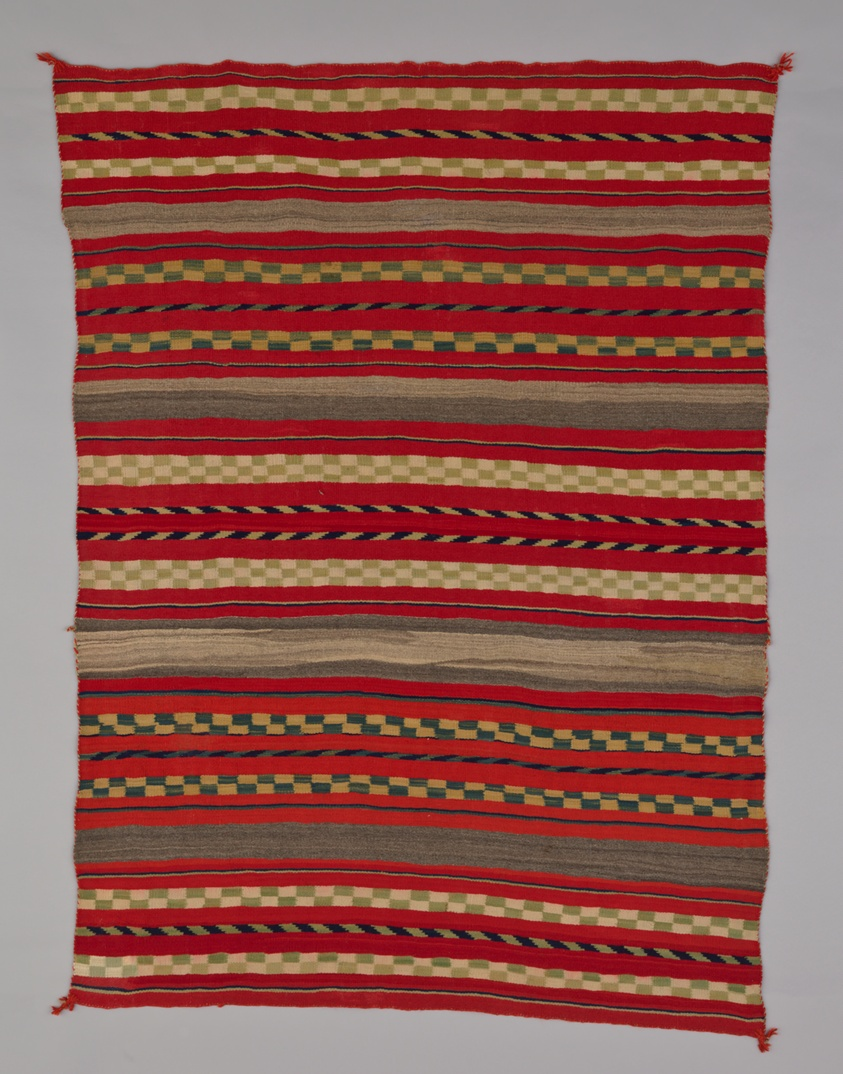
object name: Textile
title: Sarape with Compound Banded Design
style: navajo, dine, Arts of the Americas, indigenous, north american, native american, native north american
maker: Navajo (Diné) (Arizona, New Mexico, and Utah, United States)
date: 1870–95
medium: Natural and Germantown wool, plain weave and single interlocking tapestry weave; twined warp ends and selvages; looped and knotted augmented corner tassels; natural and synthetic dyes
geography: New Mexico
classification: textile; wearing blanket; art of the americas; costume - weaving; weaving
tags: stripes, geometric motif, lines